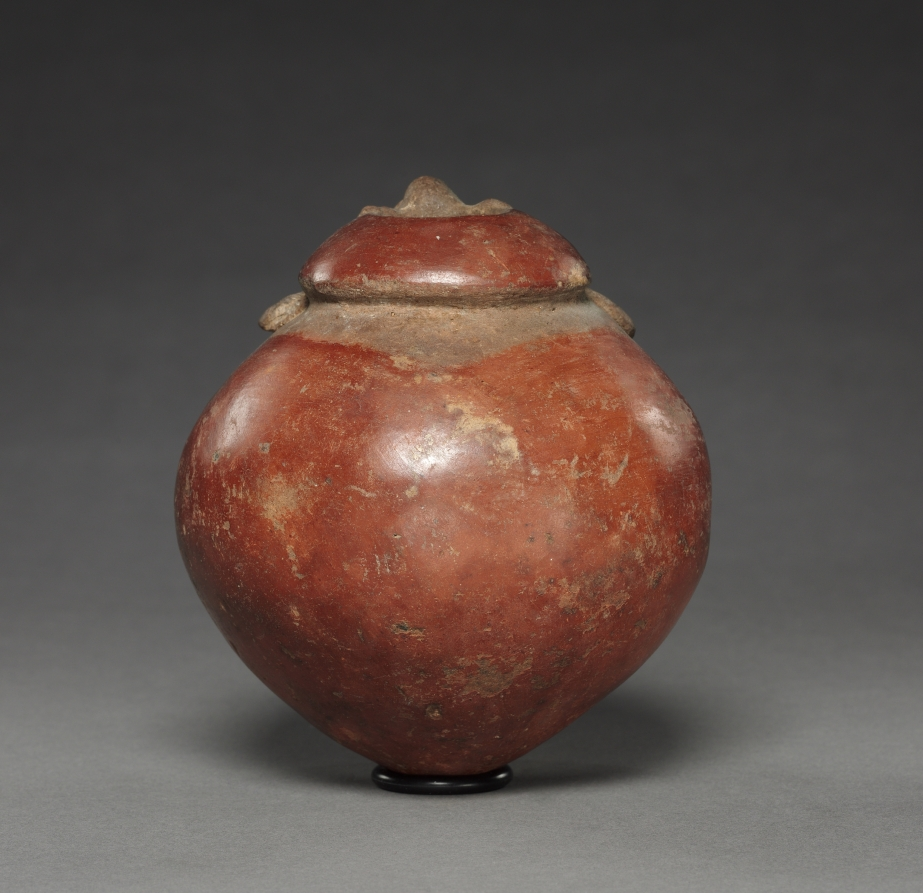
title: Dish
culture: Colombia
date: before 1550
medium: pottery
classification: Ceramic